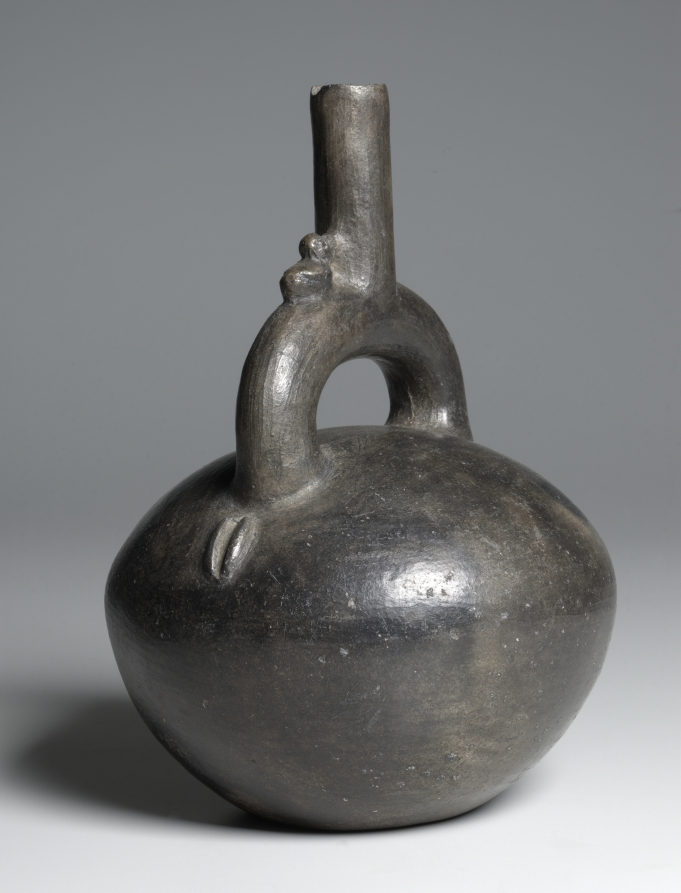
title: Darkware Vessel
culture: Peru, North Coast, Chimú style (900-1470)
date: Chimú style (900–1470)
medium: black ware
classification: Ceramic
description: Under the Chimú, whose empire stretched for 800 miles along the Peruvian north coast, the value of ceramics fell, perhaps because high-status vessels were made of precious metals. Accordingly, ceramics were mass-produced with molds and, rather than bearing painted scenes, often have an overall dark surface achieved by firing in a smoky atmosphere. This firing method was also used for very early Andean ceramics, including the example at the far left. We don't know whether the Chimú revived the method to venerate earlier cultures. The vessel with the stripped surface was made after the Chimú were conquered by the Inka in the late 1400s.